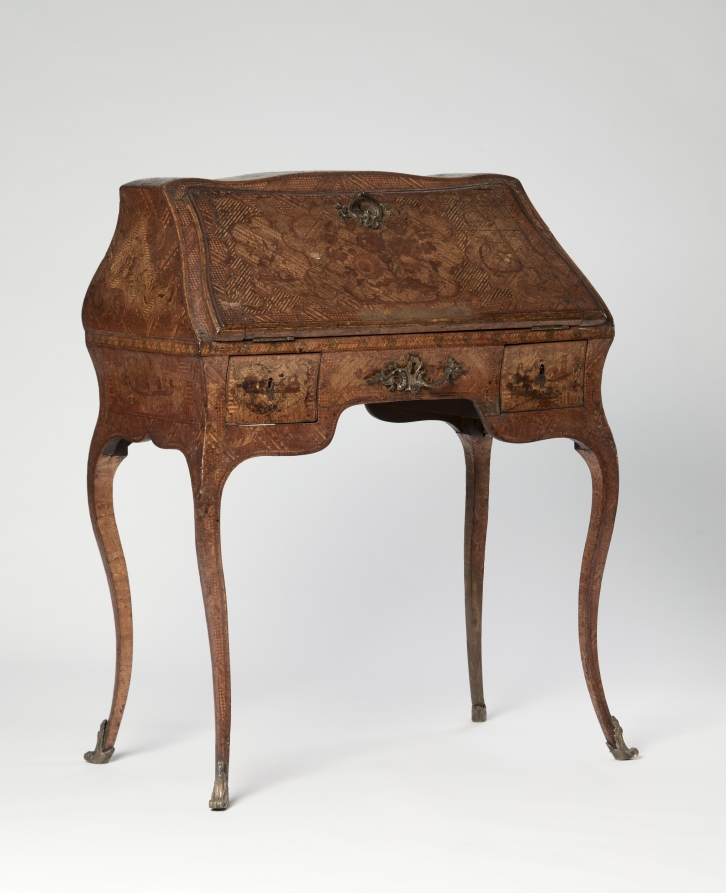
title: Ladies Writing Desk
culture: Possibly Northern Italy, near France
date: c. 1750–75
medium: Oak with straw marquetry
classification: Furniture and woodwork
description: As early as the beginning of the 17th century, straw marquetry was being produced throughout Europe. Along with cabinetmakers and specialized artisans, creators of straw marquetry included home artisans, nuns, monks, and noble dilettantes. Thus the quality and design of objects using straw marquetry is quite diverse. While some pieces appear nearly naive, others are made very masterfully, such as with this ladies writing desk. Some of these objects were even presented in royal cabinets of wonder. Because of its silky gloss and bright colors, straw marquetry was held in great esteem as unusual and remarkable decoration for furniture and other objects on par with gemstones, tortoiseshell, or ivory.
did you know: The surface of this ladies writing desk is completely covered with straw marquetry decoration both outside and in.